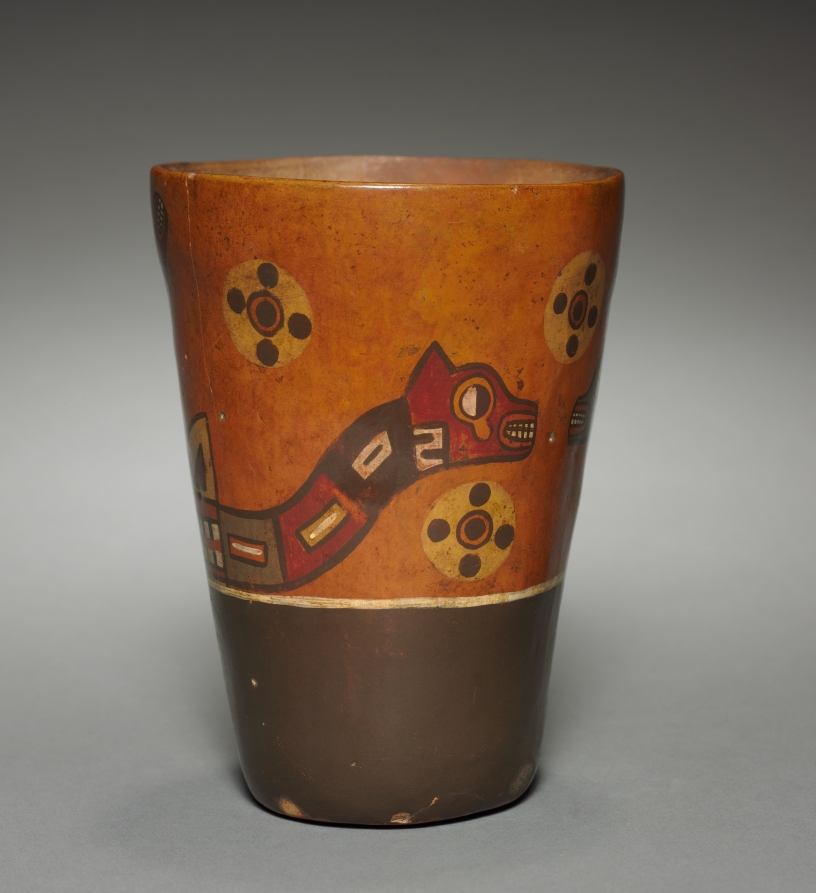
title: Kero-shaped Vessel (modern version of a Wari-style vessel)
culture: Peru, modern, 20th century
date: before 1955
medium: pottery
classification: Forgery